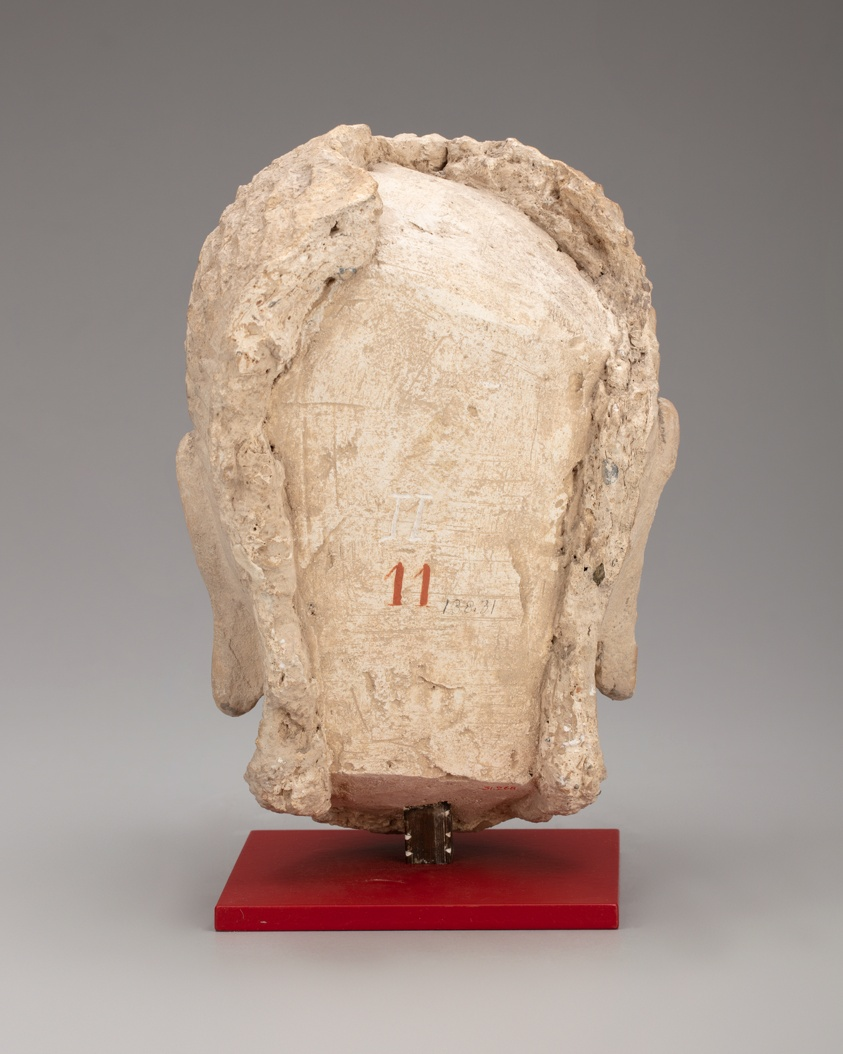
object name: Sculpture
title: Head of Buddha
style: South Asian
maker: Afghanistan or Pakistan; Ancient region of Gandhara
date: Kushan period, 3rd–5th century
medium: Stucco with traces of red pigment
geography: Gandhara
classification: bust/head; stuccowork; sculpture; asian art